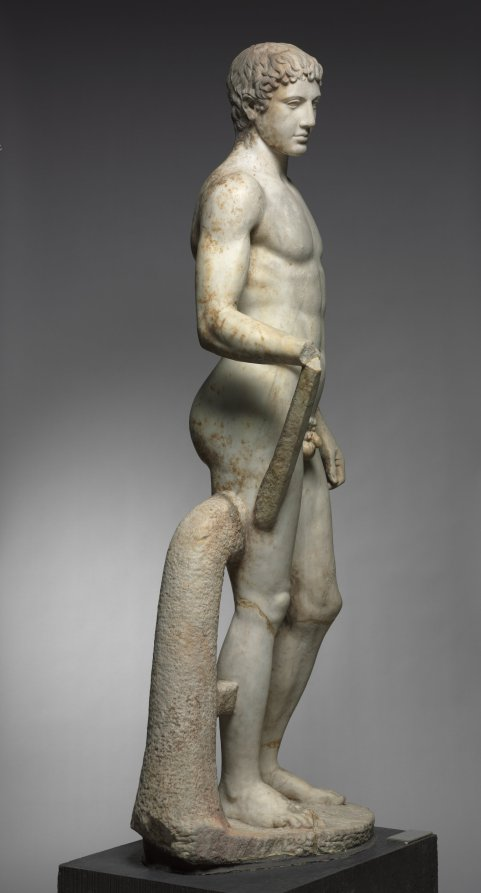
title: Statue of an Athlete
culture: Italy, Roman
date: 1–100 CE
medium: marble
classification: Sculpture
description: This idealized athlete recalls Greek sculptural types invented and popularized during the 400s BC. Large-scale athletes and other sculptures like this were originally created by famous artists as sanctuary dedications. Centuries later, they were widely copied and adapted by Roman sculptors, whose clients sought their own versions of earlier masterpieces. Working in marble rather than bronze, these sculptors added certain elements for stability, such as the struts and the large tree trunk beside the right leg here. Sculptures like this one are profoundly complex, made by and for Romans but descended from Greek ancestors.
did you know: For many years, this sculpture stood in the rotunda of the Cleveland Museum of Art.